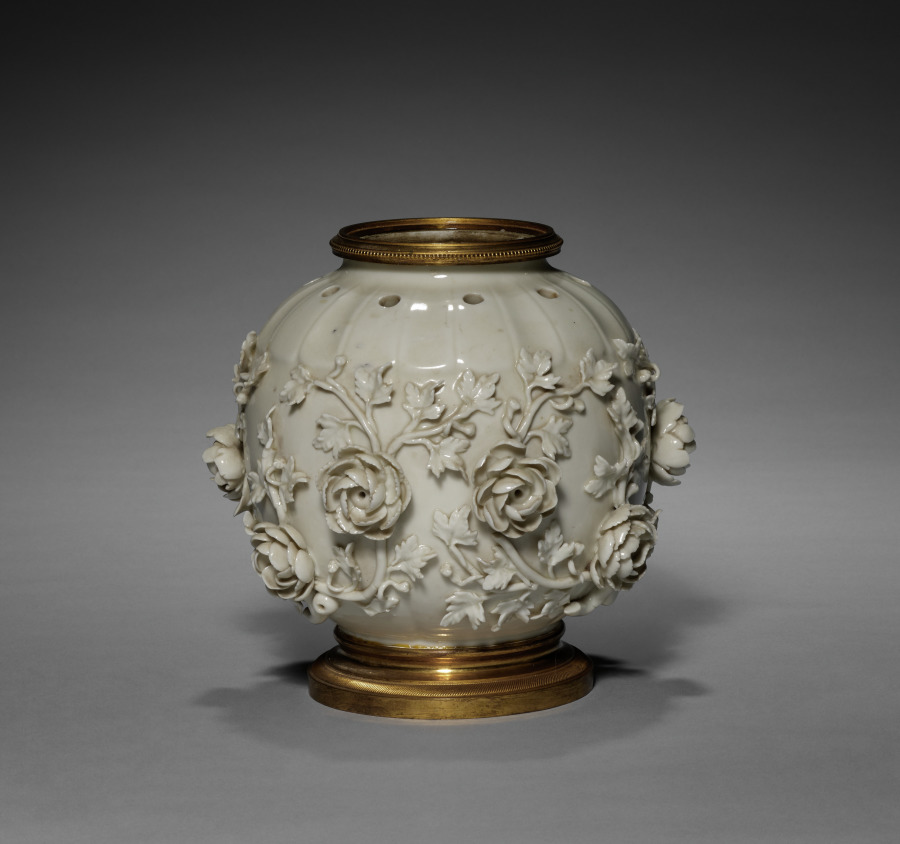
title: Potpourri Vase with Cover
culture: France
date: c. 1860–80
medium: blanc-de-chine porcelain; gilt bronze mount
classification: Ceramic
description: This vase was likely made by the celebrated Parisian ceramics firm of Edmé Samson (1810-91). To cater to the resurgence in taste for 18th-century designs, the Samson firm specialized in making reproductions of rare 18th-century European porcelains, especially those from firms that had already copied Chinese porcelains. In this case, this vase's design is taken from models produced by the St. Cloud factory in the 1750s after earlier Qing dynasty Chinese ceramics. However, the telltale sign that this vase is made by Samson and not St. Cloud is that the original would have been made from a soft-paste porcelain (fired at a lower temperature), while this example is made of hard-paste porcelain (fired at the highest temperature).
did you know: Potpourri vases always have holes in the top to let the scent of dried spices and flowers contained within freshen the air around them.